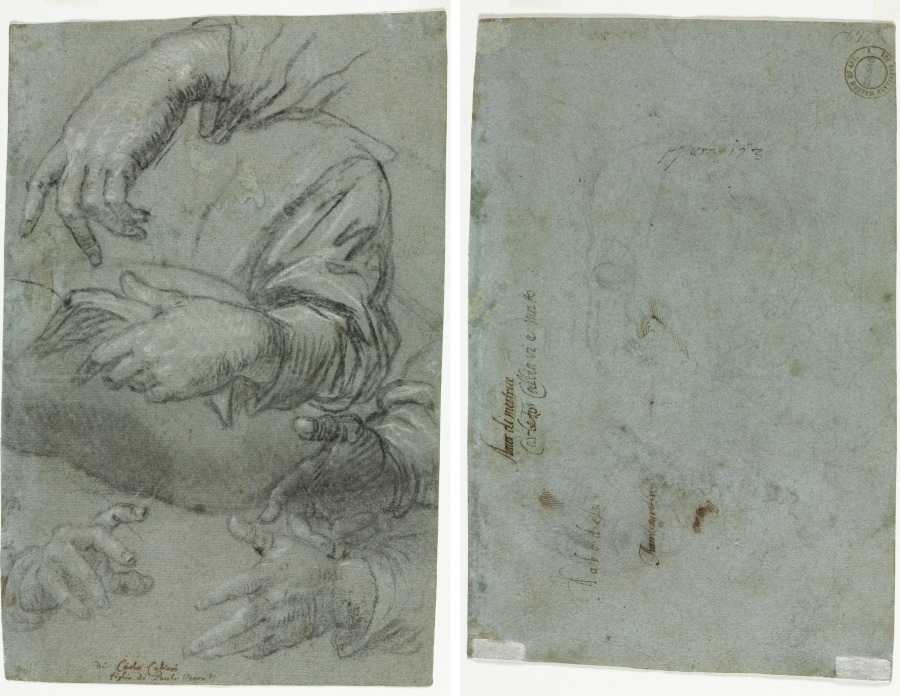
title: Studies of Hands (recto); Sketch of a Child's Head (verso)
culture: Italy, 16th century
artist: Carletto Caliari (Italian, 1570–1596)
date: c. 1586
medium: charcoal (stumped in places) heightened with white chalk; black chalk with pen and brown ink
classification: Drawing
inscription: (r) lower center, in brown ink: di Carlo Caliari / figlio di Paulo Verone. v) in brown ink “Amor di meritrice. Carletto Calliari è matto”, “Aabcdeg”, “Amor di meritrice” and in another hand, in brown ink, “Aqueta 163”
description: The talented second-born son of Italian Renaissance painter Paolo Veronese, Carletto Caliari assisted his father in the final years of the celebrated artist’s life. Successful Venetian painting studios were run as workshops, with staffs of trained apprentices working under a master’s supervision to simultaneously execute a multitude of commissions. Drawings such as this study of expressive hand gestures were used as reference materials to ensure stylistic consistency within the shop.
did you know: The inscription that identifies the artist in brown ink on this drawing is not a signature but rather an identification of the artist by a later hand, perhaps an owner of the drawing.